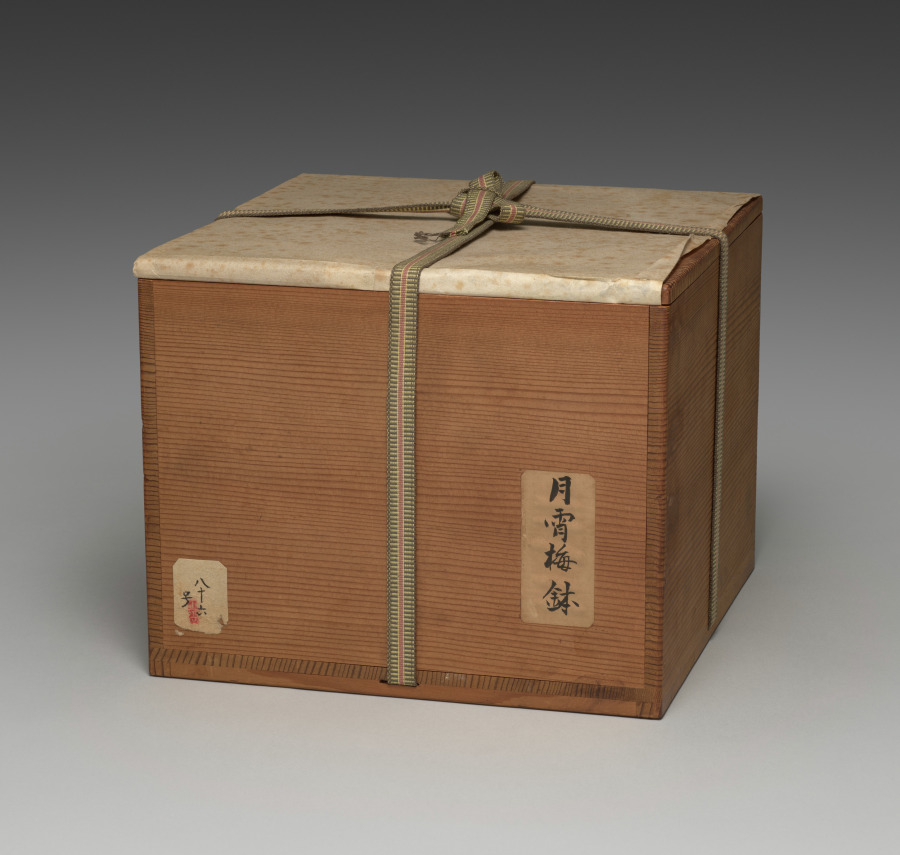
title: Sweets Bowl with Plum Tree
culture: Japan, Taishō period (1912–26) to Shōwa period (1926–89)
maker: Seifū Yohei IV (Japanese, 1872–1951)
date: 1914–46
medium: Porcelain with underglaze color and modeled design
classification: Ceramic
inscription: 清風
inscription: 清風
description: In Chinese culture, the plum symbolizes the virtue of perseverance. For his sweets bowl based on Qing dynasty (1644–1911) Chinese prototypes, Seifū Yohei IV first painted the gnarled boughs of a plum tree in iron oxide on the surface. Then he made the tree’s blossoms slightly raised by building up slip, or liquified clay. He painted their centers yellow. Before applying the blue glaze, he covered the blossoms with paper so that they remained white.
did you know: Broad access to high-quality Chinese ceramics occasioned by the collapse of the Qing dynasty (1644–1911) and the dispersal of elite Chinese collections presented Seifū Yohei IV with models for both molded decoration and painted motifs.